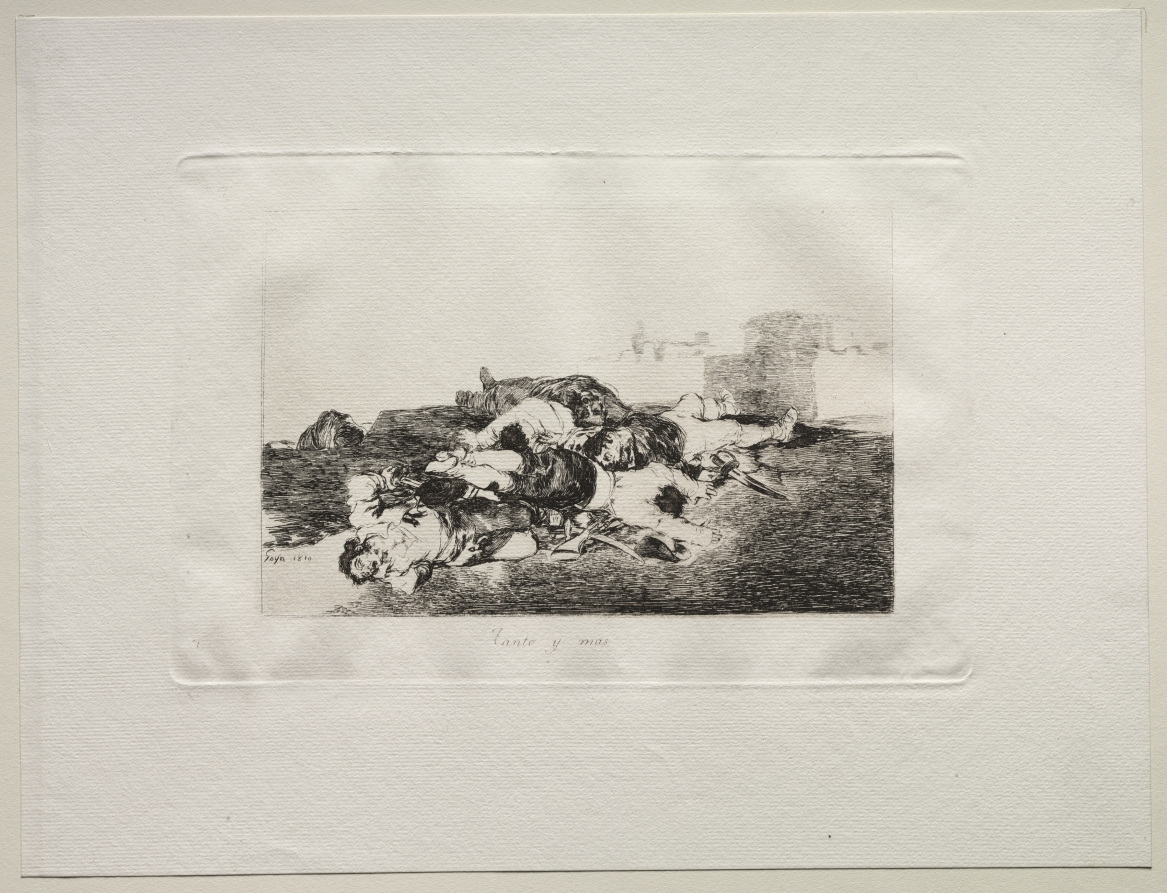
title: The Horrors of War: Even Worse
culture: Spain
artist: Francisco de Goya (Spanish, 1746–1828)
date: 1810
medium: etching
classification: Print